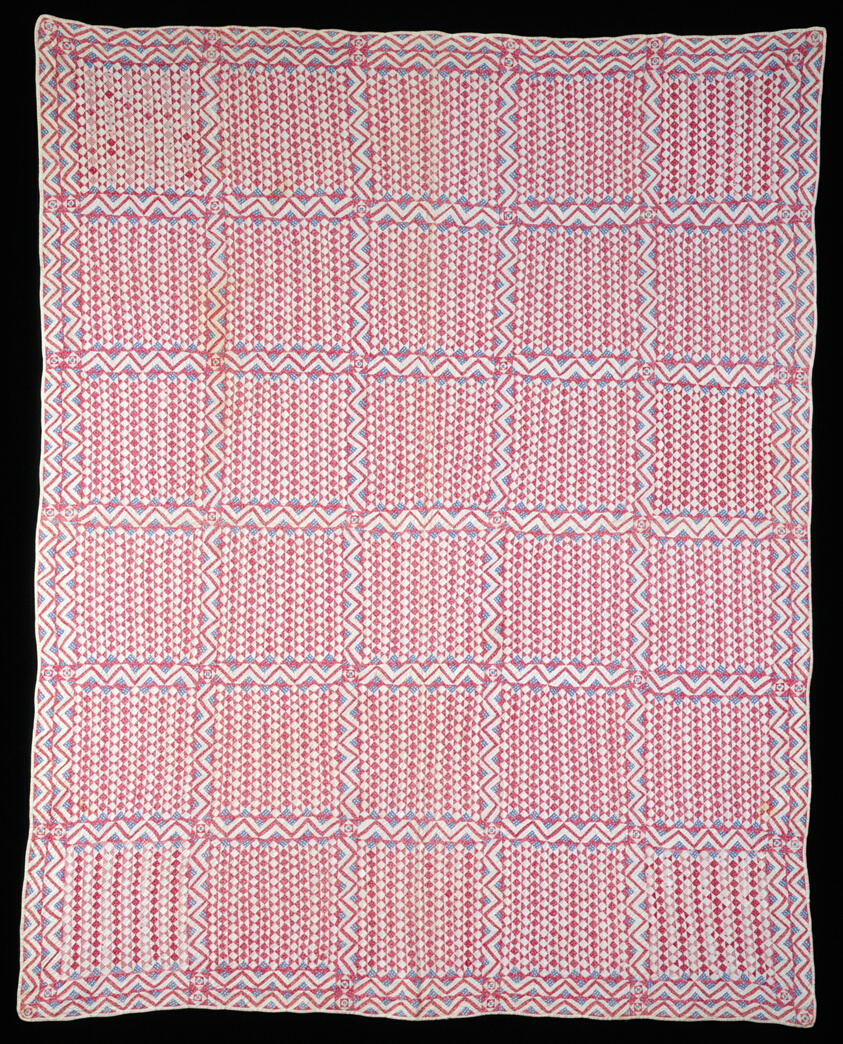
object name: Textile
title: Bedcover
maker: United States, Ohio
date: c. 1870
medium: Cotton, plain weaves, roller printed; pieced; backed with cotton, plain weave; quilted with cotton thread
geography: Ohio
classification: textile; needlework - quilt